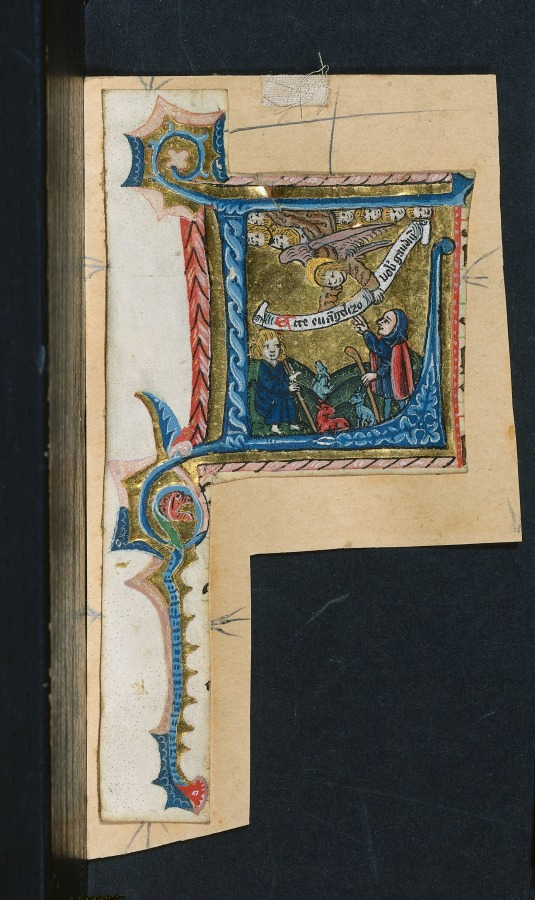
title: Three Cuttings from a Missal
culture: Germany, Franconia or Saxony (?) or Silesia (?), 15th century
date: c. 1470–1500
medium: ink, tempera and gold on vellum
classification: Manuscript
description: These three cuttings are illuminated in a style that is somewhat provincial and difficult to localize. The figures relate to late 15th-century German woodcut illustration, but also vaguely recall Franconian sculpture and Saxon painting. The figures are simply, though charmingly, sketched in heavy black ink with little attention to finesse of line or detail. The palette is confined to dark hues of red, blue, and ochre with flesh tones either left white or colored pink. The style hints at an origin in Franconia, Saxony, or Silesia. The initial E includes a form of musical notation called Hufnagalshrift or "horseshoe nail writing" because it resembles the nails used to attached horseshoes. Hufnagalshrift appears almost exclusively in manuscripts produced in Germanic Central Europe. The use of different colored lines in the musical stave is a known feature of Saxony. The text Exultet iam angelica (Rejoice now angel) begins the prayer used only on Holy Saturday during the Easter Vigil. It was sung by the priest at Mass to a very special and ancient melody.